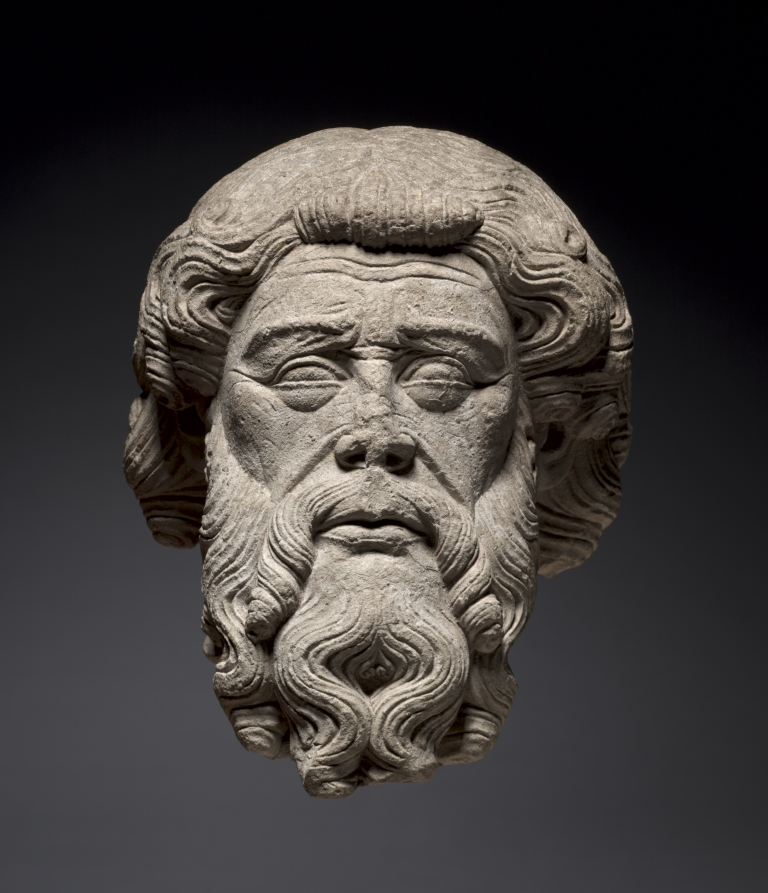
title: Head of an Apostle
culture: Southwestern France, Toulouse?, 14th century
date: c. 1325–1350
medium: limestone, with traces of polychromy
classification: Sculpture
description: This detached head with deeply incised hair was likely that of a large, nearly life-sized figure of an apostle. It would have originally stood more than 6 feet in height and was gilded and painted. The head was formerly affixed to a halo carved from the same block of stone, and the head would have been slightly angled downward. Though its original context is unknown, the style is generally suggestive of sculptural programs in Toulouse during the early 1300s.